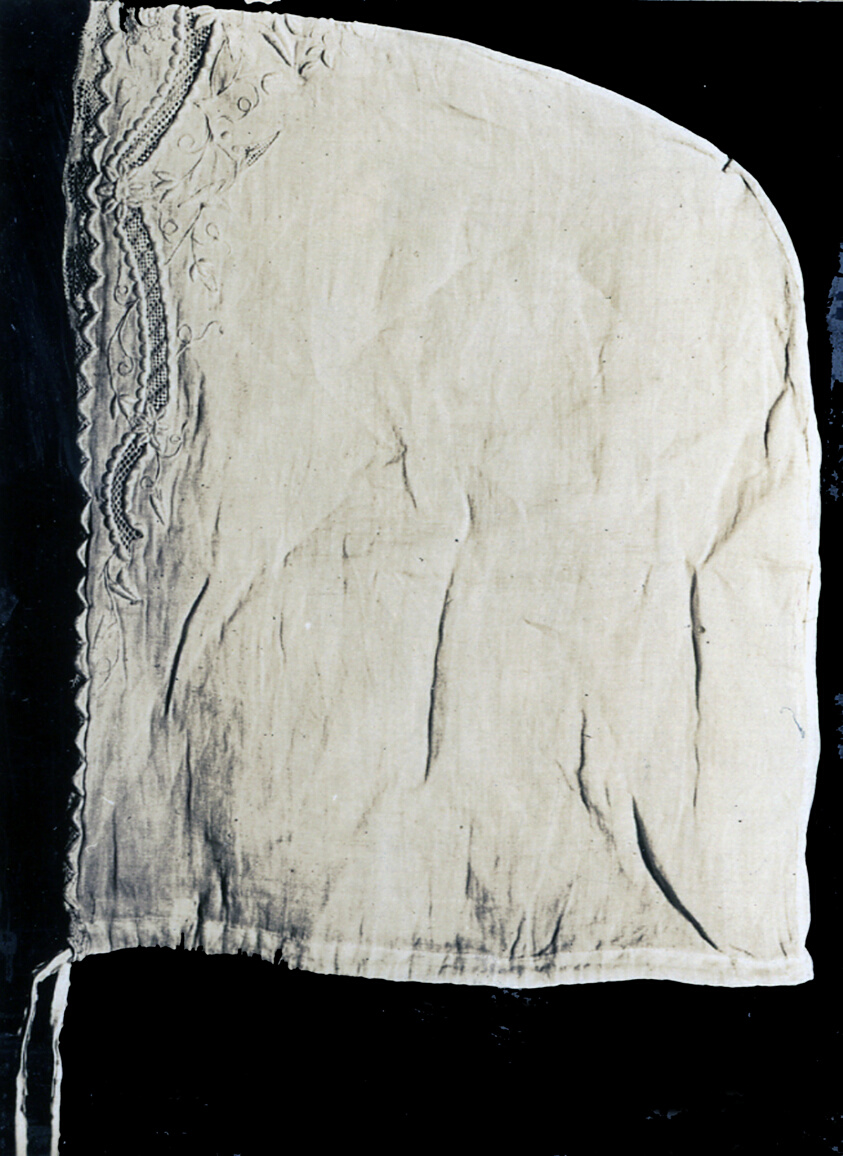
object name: Textile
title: Cap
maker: France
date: 19th century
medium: Linen, plain weave; embroidered with linen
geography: France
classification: textile; costume accessory - headdress; headdress - needlework; needlework (visual works); costume; dress (garment); clothing